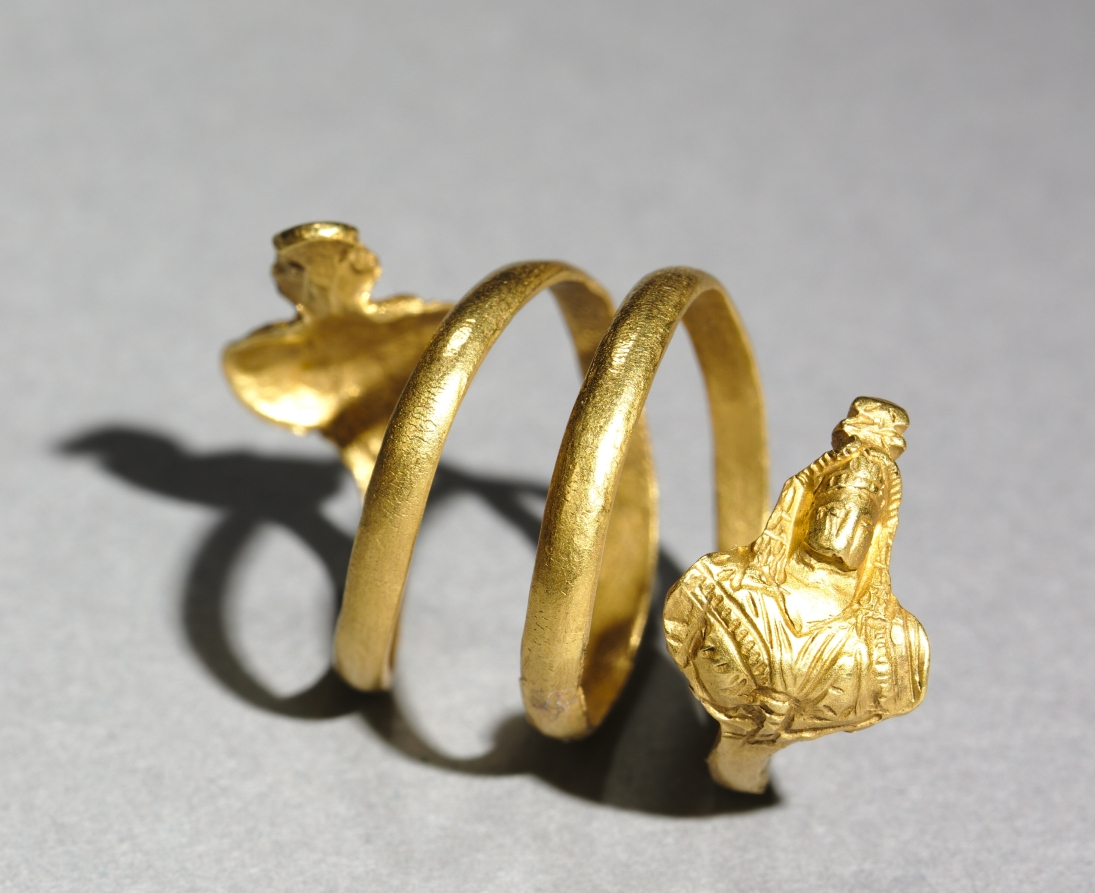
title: Spiral Ring with Isis and Serapis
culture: Greece or Italy, Rome (?)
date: 1–100 CE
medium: gold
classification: Jewelry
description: This spiral gold ring is decorated with tiny busts on either terminal, representing the gods Isis and Serapis. Both gods are shown from the waist up, with wide shoulders and small heads that create a shape reminiscent of a cobra snake.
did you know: The two ends of this spiral ring terminate in humanlike protomes.